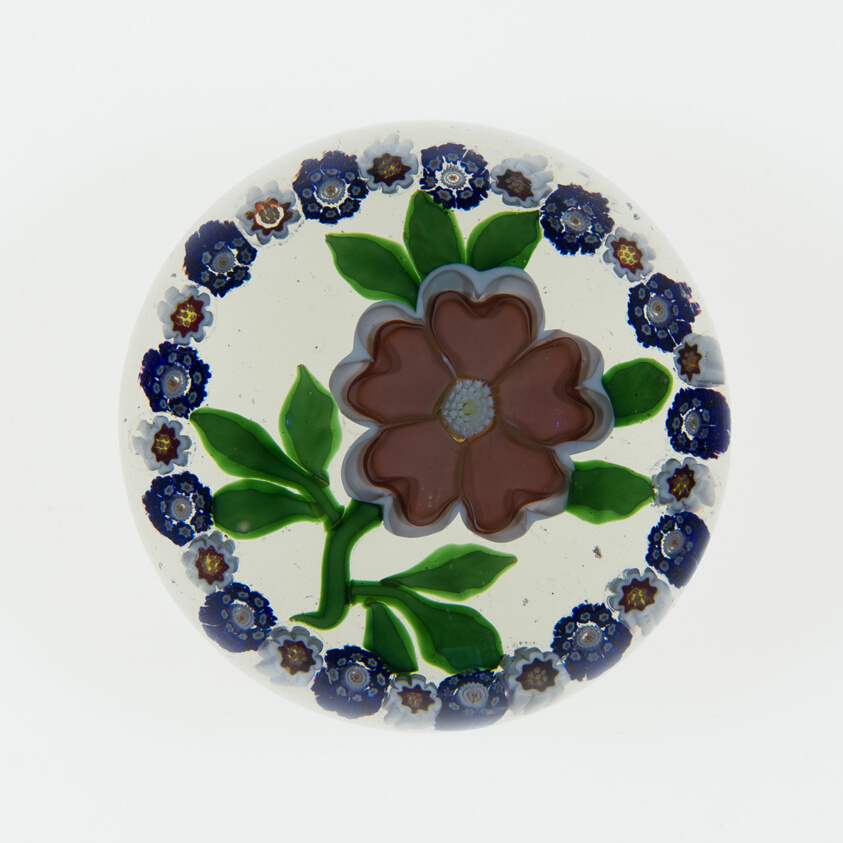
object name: Glass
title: Paperweight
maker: Baccarat Glassworks (Cristalleries de Baccarat); Lorraine, France, founded 1764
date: c. 1848–55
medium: Glass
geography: Baccarat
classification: paperweight; glass